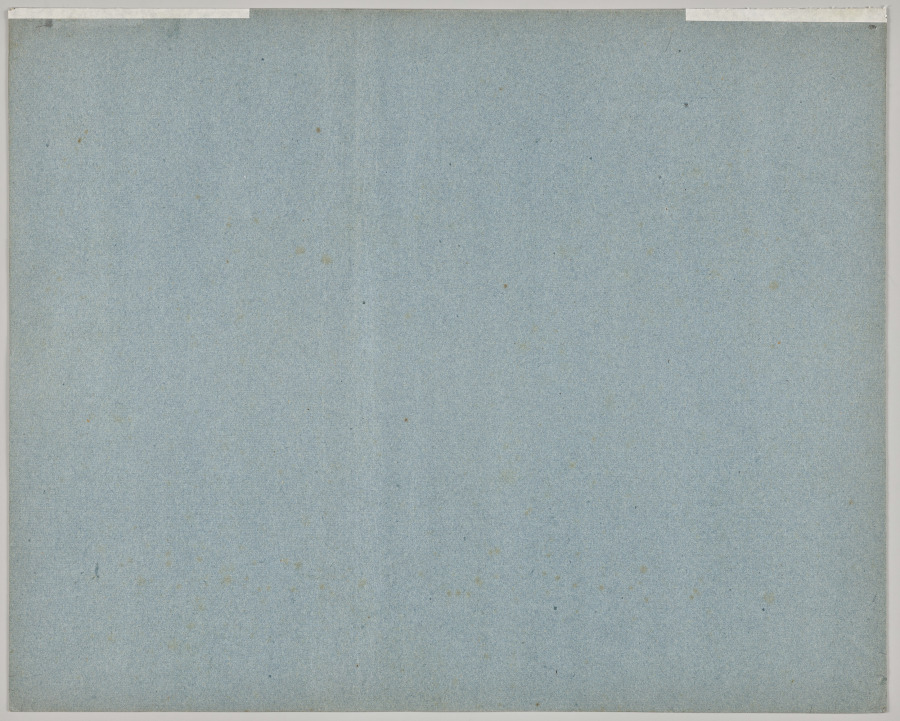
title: Dedication. John XI, 25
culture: Germany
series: Seven Areas from Salzburg and Berchtesgaden. Arranged according to the seven days of the week, connected by two allegorical sheets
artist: Ferdinand Olivier (German, 1785–1841)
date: 1818–23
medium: lithograph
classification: Print